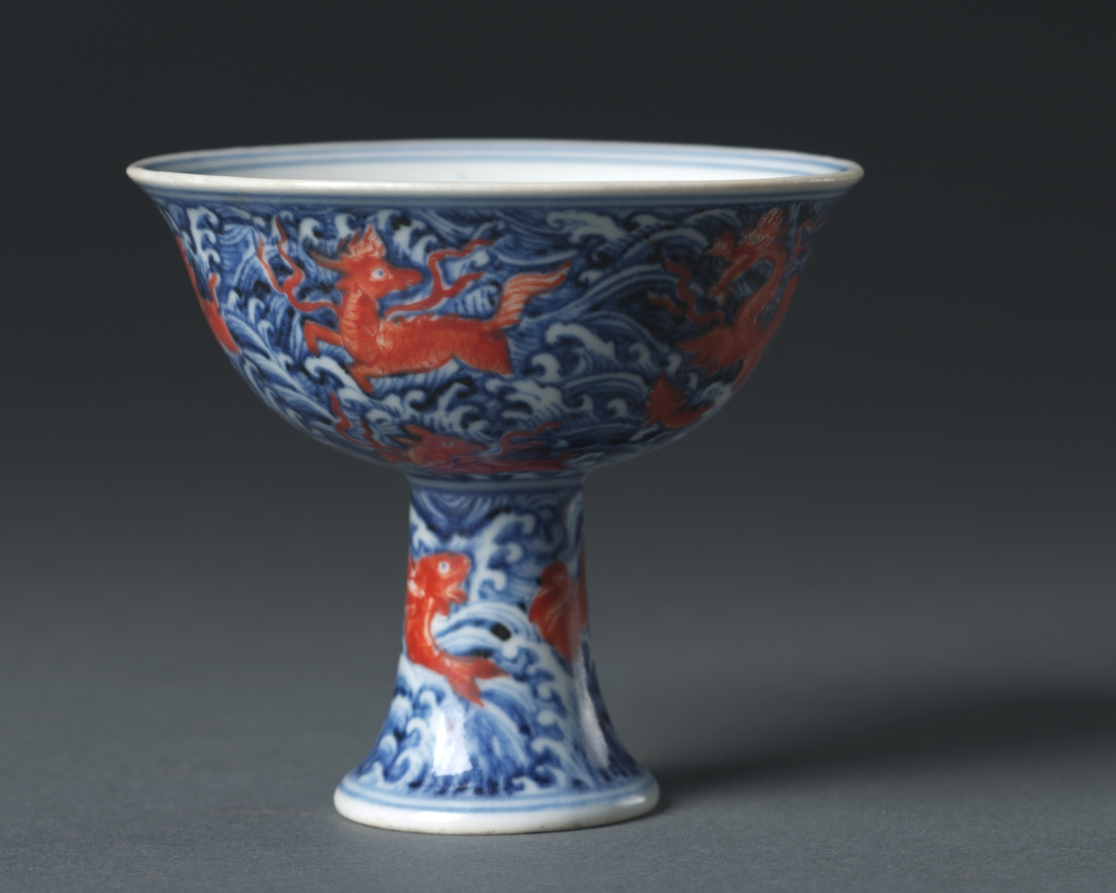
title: Stem Cup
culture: China, Jiangxi Province, Jingdezhen, Ming dynasty (1368–1644), Xuande mark and period (1426–35)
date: 1426–35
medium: porcelain with underglaze blue and overglaze red enamel decoration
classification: Ceramic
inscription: 大明宣德年製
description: These two Ming imperial wares [CMA 1957.60 and CMA 1957.61] are among the smallest, but most precious, of the museum's holdings in Chinese ceramics. The luminous glaze, gestural freedom, and vibrant color are perfectly unified to fit the delicate shapes of these luxury items.